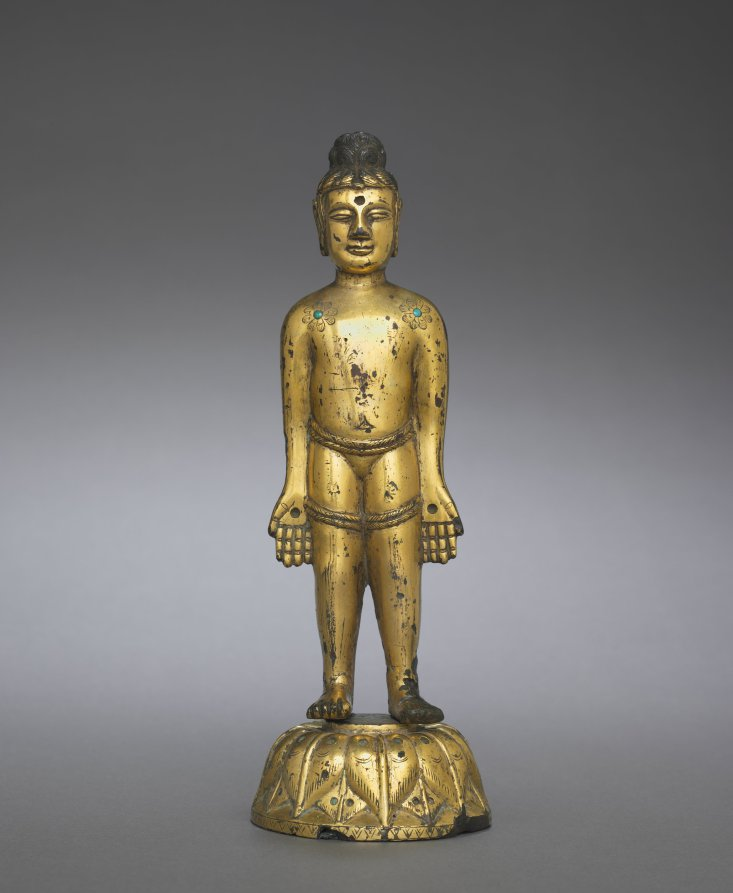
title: The New-born Buddha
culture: China, Northern Wei dynasty (386-534)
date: 400s CE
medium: gilt bronze with inlays of blue glass and turquoise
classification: Sculpture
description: This image of the newborn Buddha is rare and unusual. The common type represents him taking seven steps while proclaiming "I am supreme in the Universe." Here, he is represented as being bathed by the nine Nagas, with both hands down.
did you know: The tang on the back of the Buddha's head shows that it originally had a halo.